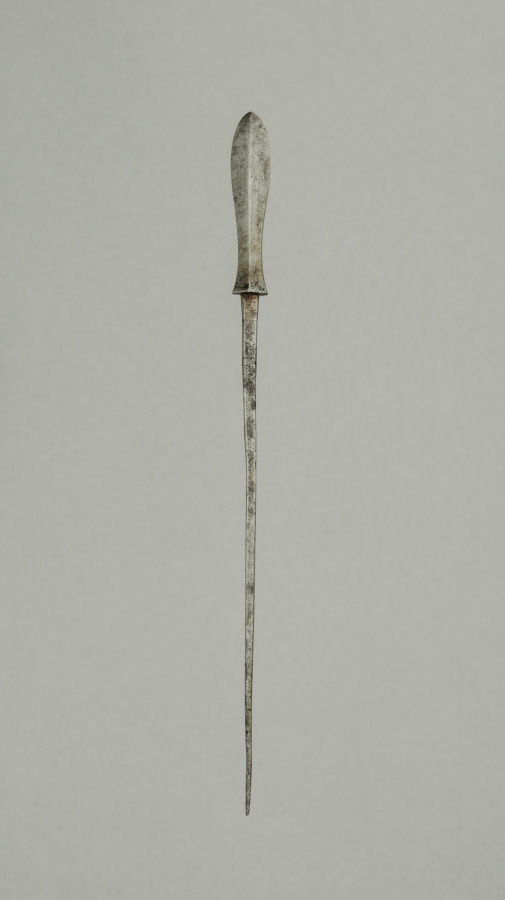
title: Arrow Point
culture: Japan, Edo period (1615–1868)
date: 1700s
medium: steel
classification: Arms and Armor